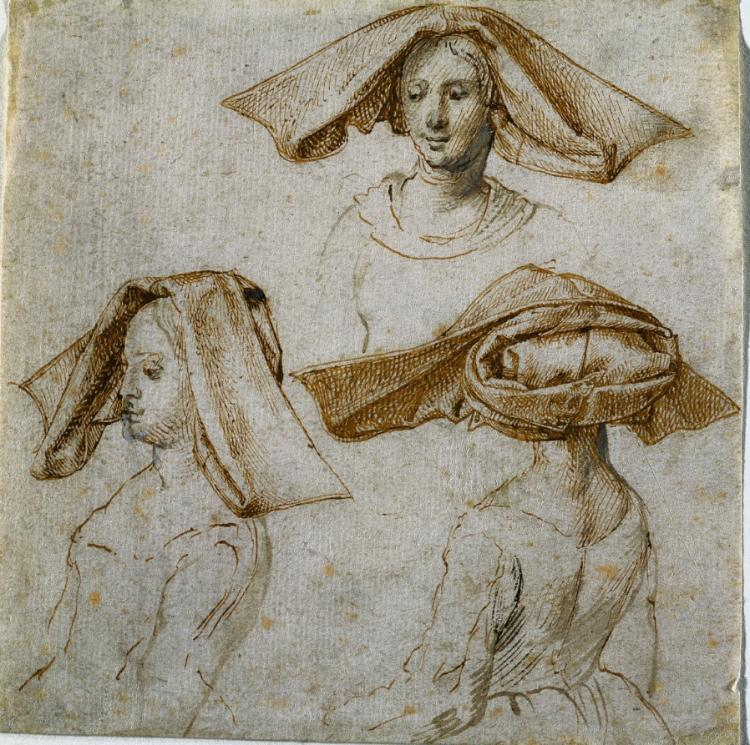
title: Three Studies of a Woman Wearing an Elaborate Headdress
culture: Netherlands(?), 16th century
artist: Anonymous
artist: retouched by Peter Paul Rubens (Flemish, 1577–1640)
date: c. 1500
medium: Pen and brown ink; retouched with brush and brown wash, lead white (partially oxidized)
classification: Drawing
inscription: VERSO, center, in graphite: Van Eyck [upside down] / [illegible] [upside down] ; lower right, in brown ink: R.P.R [upside down] (Lugt 2234)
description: This young woman’s long, conical hood is tucked under and pinned, with the front folded over to create wide, sloping flaps. Such headgear kept heat and cold away during outdoor labor, but around 1475, the style was adopted as a fashion statement by middle- and upper-class women, with the fabric starched for exaggerated effect. The drawing was likely made for a model book in an artist’s workshop of costume details for reference. More than 100 years later, the Antwerp artist Rubens acquired the drawing for his own model book and even drew over it.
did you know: In the 1600s, the artist Peter Paul Rubens made additions in ink wash and white paint to this c. 1500 drawing by an unknown Netherlandish artist.